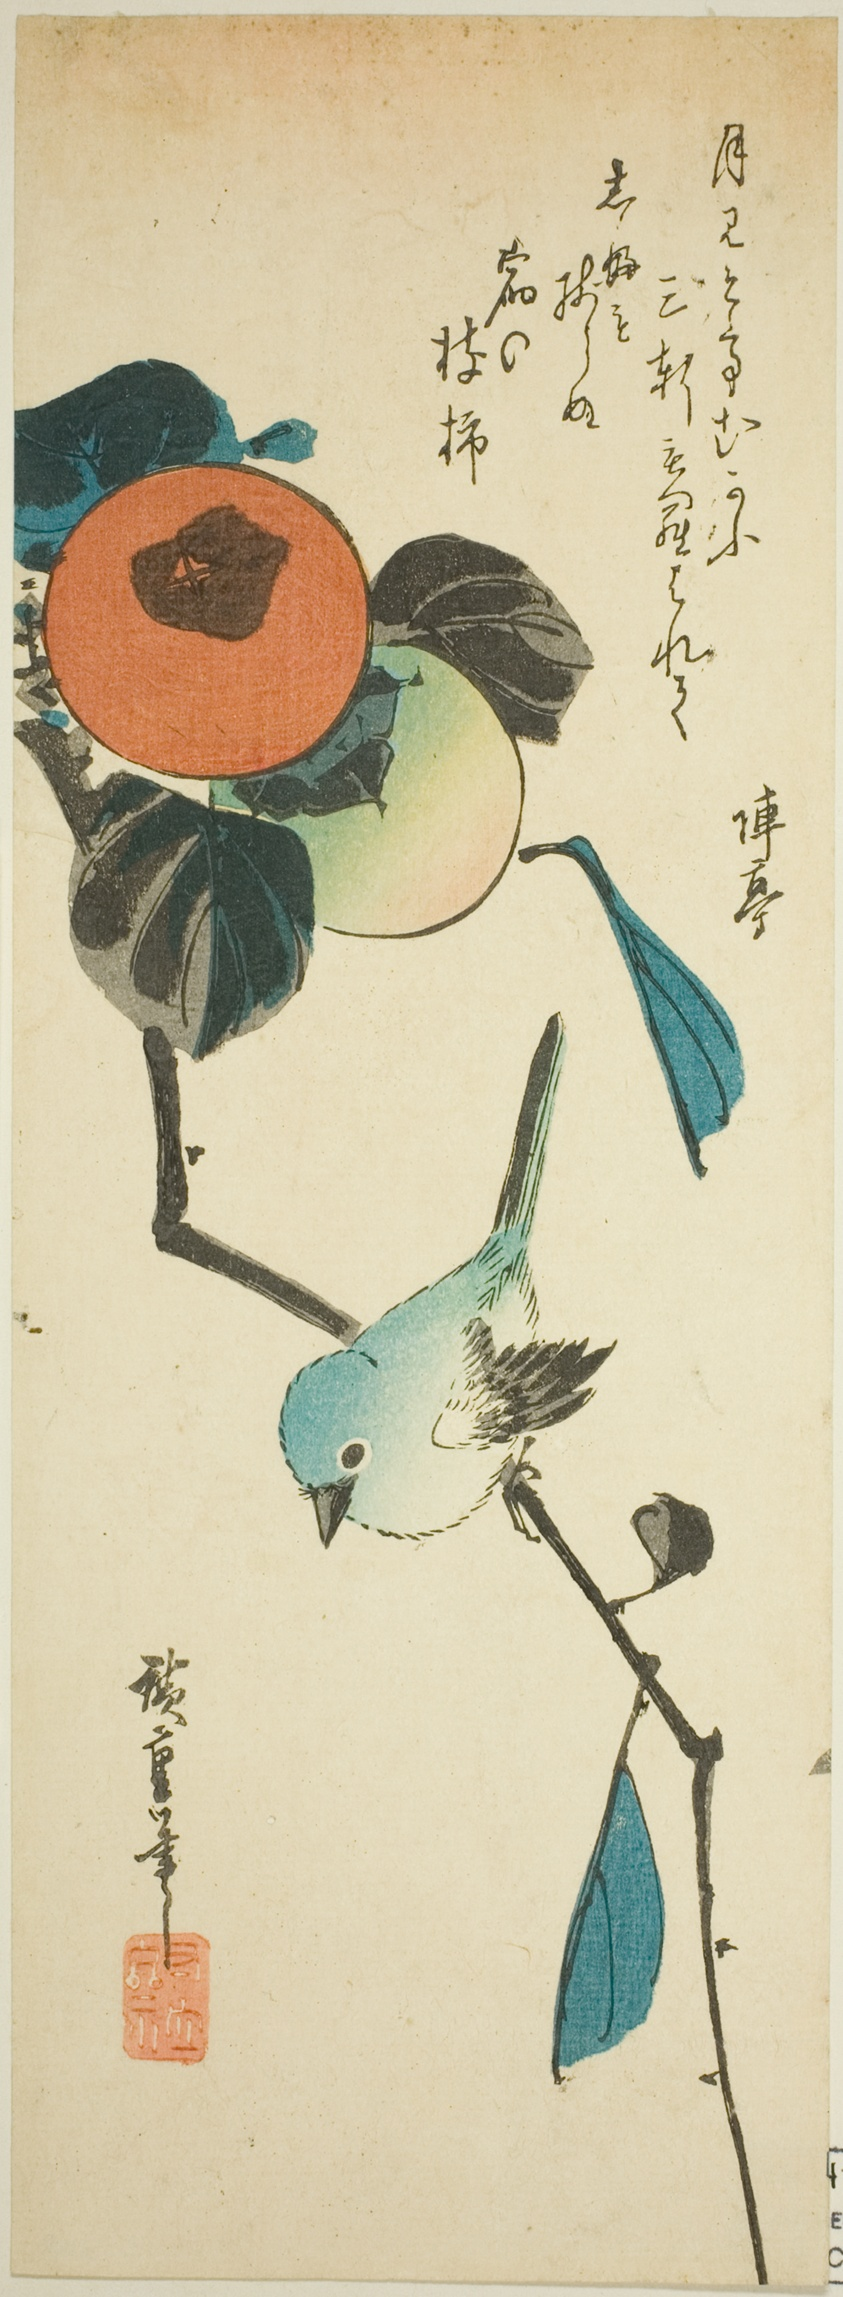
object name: Print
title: Japanese white-eye and persimmons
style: Japanese (culture or style)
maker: Utagawa Hiroshige 歌川 広重; Japanese, 1797-1858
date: 1830s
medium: Color woodblock print; chutanzaku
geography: Japan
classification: woodblock print; print; asian art